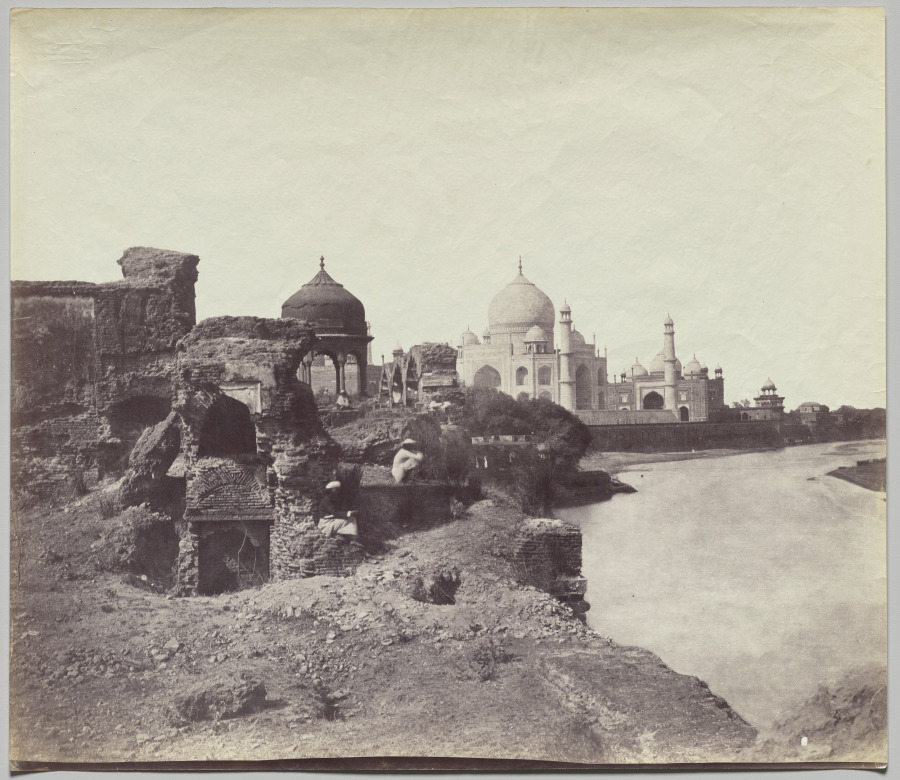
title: The Taj Mahal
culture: England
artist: Dr. John Murray (Scottish, 1809–1898)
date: c. 1858–62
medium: albumen print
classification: Photograph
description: This view of the Taj Mahal, shot from the bank of the Yamuna River, offers a dramatic contrast between the seemingly perfect white marble monument in the background and dark, ruined structures in the foreground. It sets the Taj into a broader geographic and cultural context by including nature (the river) and two cultures, one that has crumbled and another that, because it approaches aesthetic perfection, has been carefully preserved.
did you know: The Taj Mahal is a monument to lost love, built by Shah Jahan in 1632–53 to house the tomb of his favorite wife, Mumtaz Mahal.